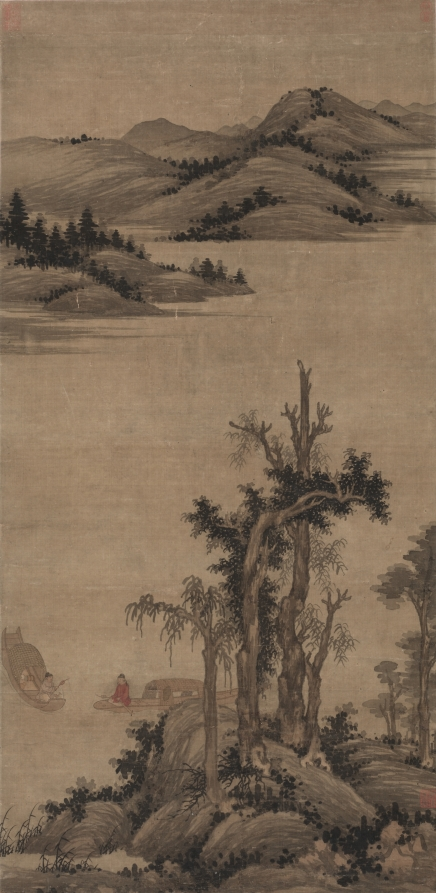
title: Fishermen-Hermits in Stream and Mountain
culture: China, Yuan dynasty (1271-1368)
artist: Zhao Yong (Chinese, c. 1289-c. 1362)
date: 1300s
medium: Hanging scroll; ink and color on silk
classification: Painting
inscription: 仲穆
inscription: [印] 吳興張氏圖書之記; [印] 心賞; [印] 張珩私印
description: In this typical southern two shores divided by a river composition, two fishermen, each seated in the stern of his covered houseboat, troll their hooks in the swirling water, holding short rods fitted with spooling reels. Zhao Yong was a son of the southern calligrapher and statesman Zhao Mengfu, who, like his father was a scholar-official in the Mongol-Yuan government. As public servants of the Yuan state and administration, scholar-artists like the Zhaos delighted in paintings that pictured them in nature as fishermen amid vistas of Jiangnan, which they considered their home.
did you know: The composition of two shores divided by a river was mostly famously associated with the Yuan painter Ni Zan.